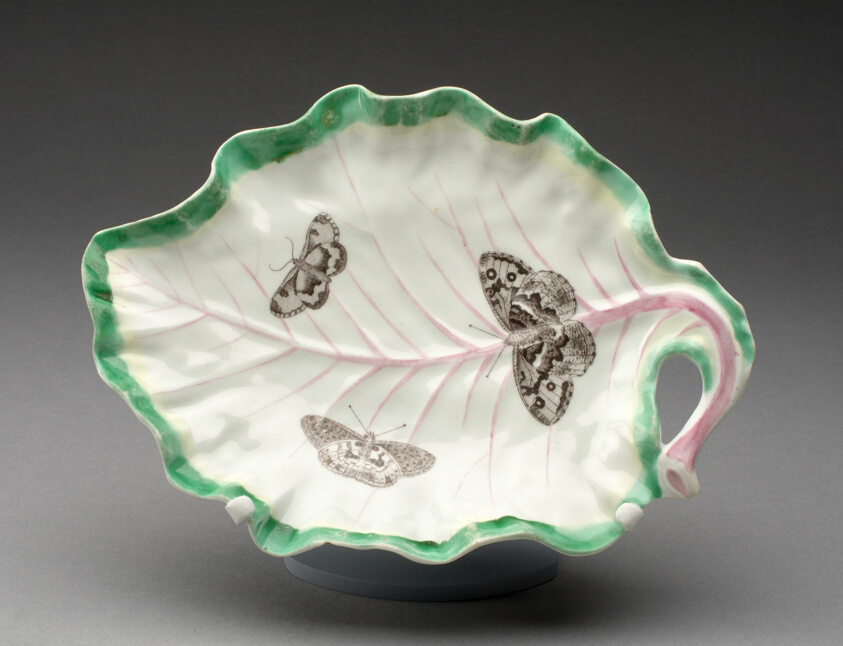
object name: Ceramics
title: Tobacco Leaf Dish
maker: Worcester Porcelain Factory (Warmstry House Period, 1751–1783); Worcester, England, founded 1751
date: c. 1760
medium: Soft-paste porcelain with polychrome enamels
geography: Worcester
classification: dish (vessel); tableware; porcelain; european decorative arts; ceramics